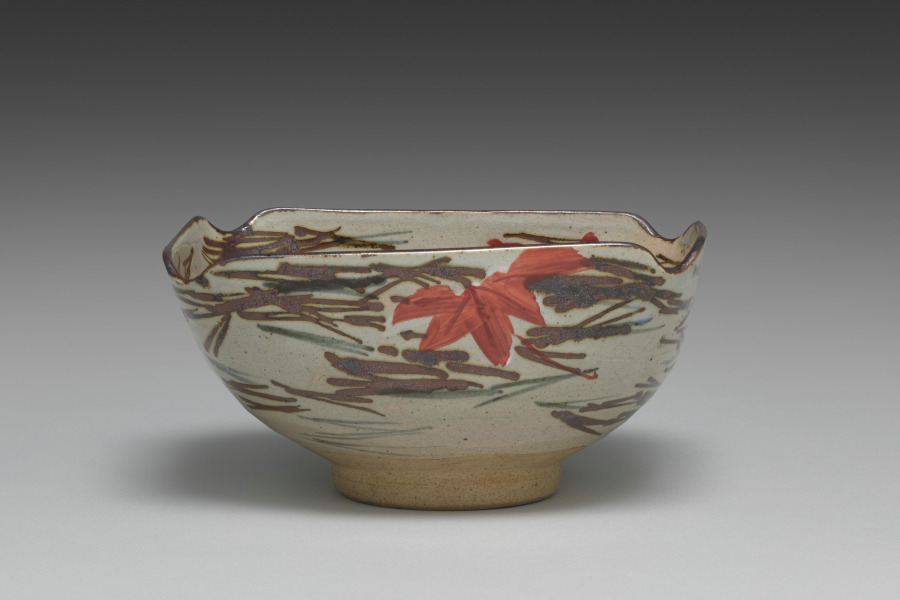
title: Nesting Dish with Scattered Pine Needles and Maple Leaves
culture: Japan, Edo period (1615–1868)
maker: Seifū Yohei I (Japanese, 1801–1861)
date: 1861–78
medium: One of a pair of side dishes; stoneware with underglaze blue and iron oxide, white slip, and overglaze color enamel (Kyoto ware)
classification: Ceramic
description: Seifū Yohei I made both blue and white porcelains after Ming dynasty (1368–1644) Chinese wares fired in the kilns at Jingdezhen for export. He also made colorful stoneware in the style of his teacher, Nin’ami Dōhachi (Takahashi Dōhachi II) (1783–1855).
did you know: Where he intended to place the maple leaves, Yohei I first applied a white color, which can be seen around the leaf edges under the glaze. This layering on top of the white brightens the color of the translucent red overglaze.